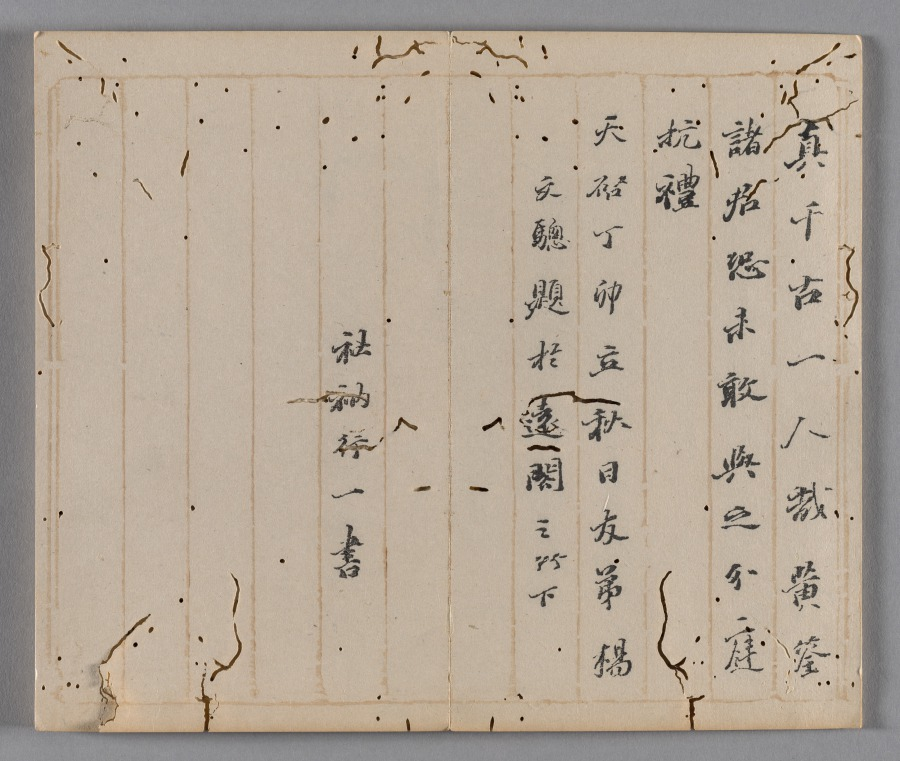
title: Ten Bamboo Studio Painting and Calligraphy Handbook (Shizhuzhai shuhua pu): Birds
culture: China, Qing dynasty (1644-1911)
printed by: Hu Zhengyan (Chinese, c. 1584–1674)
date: 1633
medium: Woodblock-printed book; ink and colors on paper; first edition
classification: Print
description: Color printing reached a level of perfection in the early 1600s, as seen in this Ten Bamboo Studio Collection of Calligraphy and Painting and the Mustard Seed Garden Manual of Painting (printed 1679 and 1701). The painterly quality, precision in registering (aligning) the woodblocks, and harmonious colors made them the most successful color print editions in Chinese history. Both editions were printed and compiled in Nanjing, spread nationwide, and had a great impact on the arts in Japan and Korea.